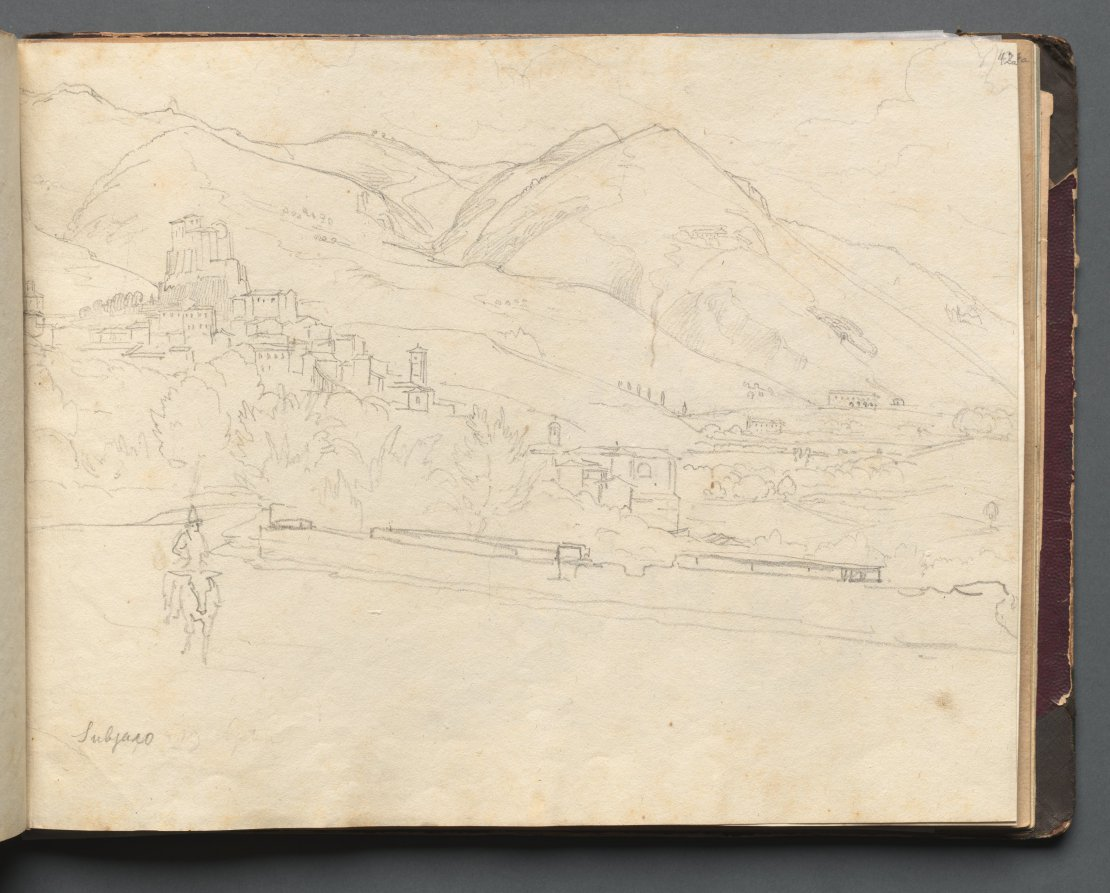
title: Album with Views of Rome and Surroundings, Landscape Studies, page 42a: Roman Landscape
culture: Germany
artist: Franz Johann Heinrich Nadorp (German, 1794–1876)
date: c. 1830s-70s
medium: graphite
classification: Bound Volume